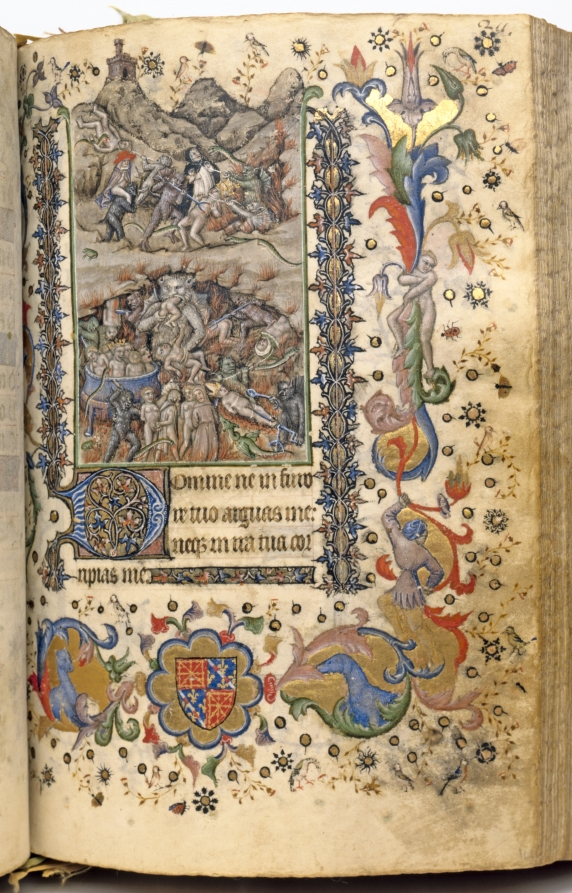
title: Hours of Charles the Noble, King of Navarre (1361-1425): fol. 211r, Text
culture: France, Paris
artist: Master of the Brussels Initials and Associates (French)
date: c. 1405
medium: ink, tempera, and gold on vellum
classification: Bound Volume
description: This precious volume was obviously highly prized by its owner, the French-born King of Navarre, who had his coat of arms painted on no less than twenty folios. Rather than directly commissioning this manuscript from a specific workshop, it seems that Charles the Noble acquired his book of hours -- perhaps ready-made for the luxury market -- while on a trip to Paris in 1404-05. A collaborative effort, six painting styles are evidenced within the pages of this codex, those of two Italians, two Frenchmen, and two Netherlanders. The painter who was responsible for the planning and decoration of the book, and who produced seventeen of the large miniatures, was a Bolognese artist known as the Master of the Brussels Initials. His principal assistant, responsible for most of the borders, was a Florentine who signed his name "Zecho" da Firenze on folio 208 verso.